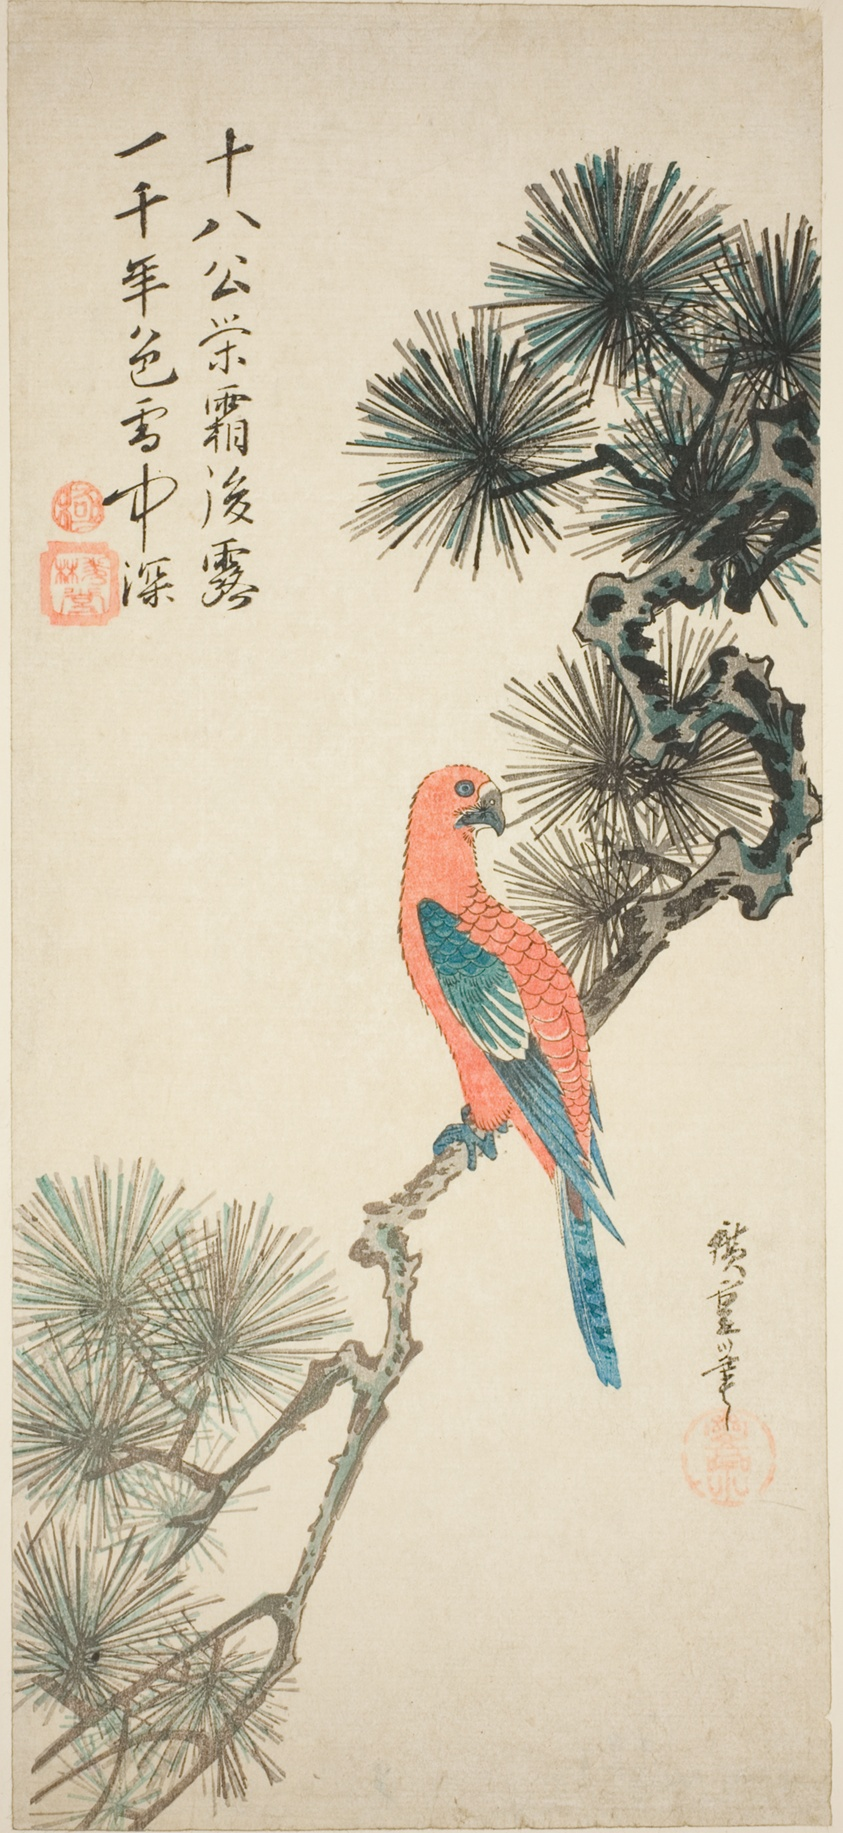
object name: Print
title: Macaw on a pine branch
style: Japanese (culture or style)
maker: Utagawa Hiroshige 歌川 広重; Japanese, 1797-1858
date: c. 1835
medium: Color woodblock print; otanzaku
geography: Japan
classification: woodblock print; print; asian art